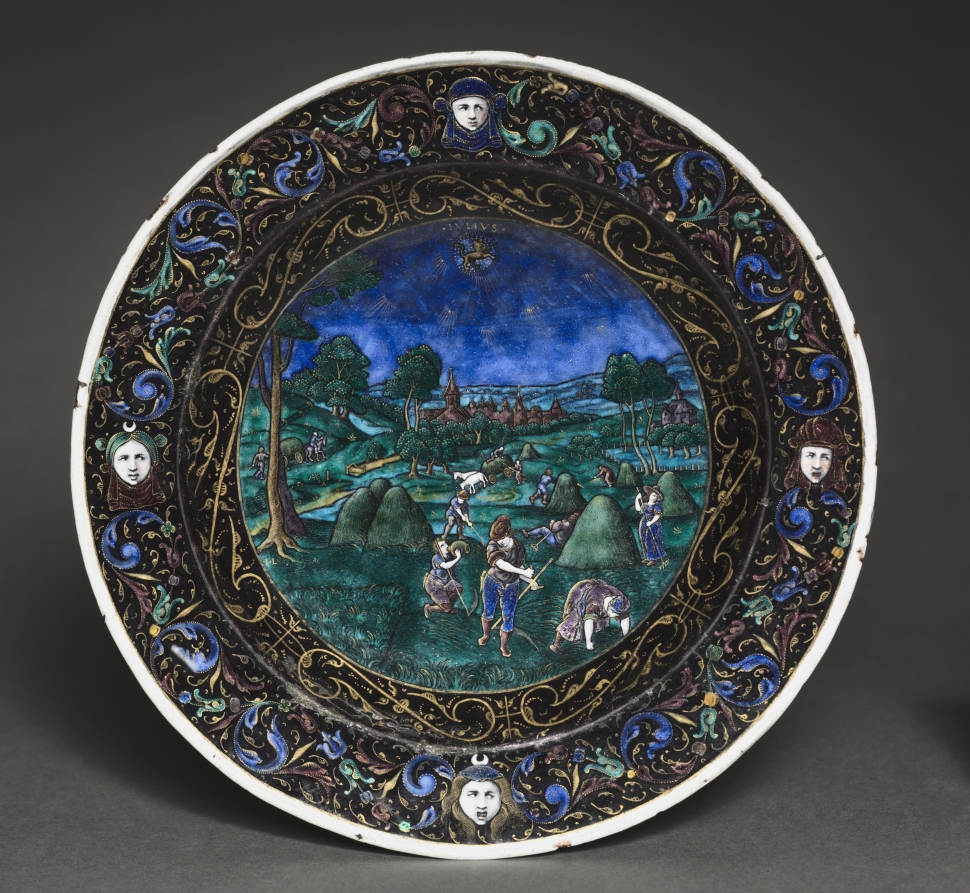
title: Plate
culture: France, Limoges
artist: Jean Limousin (French, 1528–c. 1610)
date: 1500s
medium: painted enamel on copper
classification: Enamel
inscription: signed at left under tree roots: i. L.; written at top center: IVLIVS